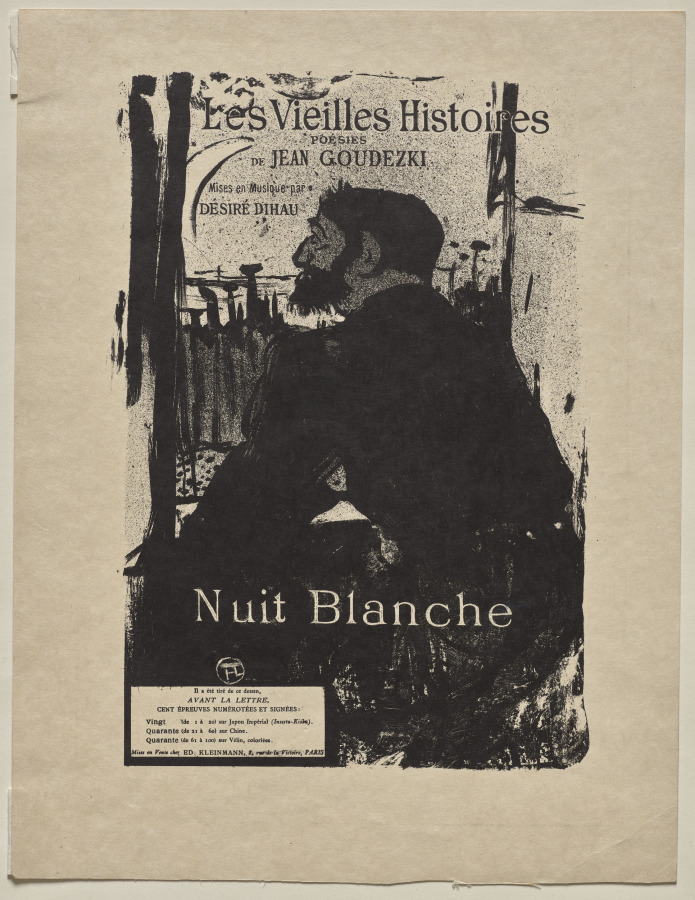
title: Sleepless Night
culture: France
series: Old Tales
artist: Henri de Toulouse-Lautrec (French, 1864–1901)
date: 1893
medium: color lithograph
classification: Print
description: Henri de Toulouse-Lautrec experimented with the recently invented technique of lithography. In addition to fine art prints, he often created ephemera, including posters and sheet music—such as this example. It was commissioned as a cover illustration for Nuit Blanche, a poem by Jean Goudezki that was set to music composed by Désiré Dihau, a well-known bassoonist.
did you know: Désiré Dihau, who composed the music for which Henri de Toulouse-Lautrec created this cover illustration, was the artist’s cousin.